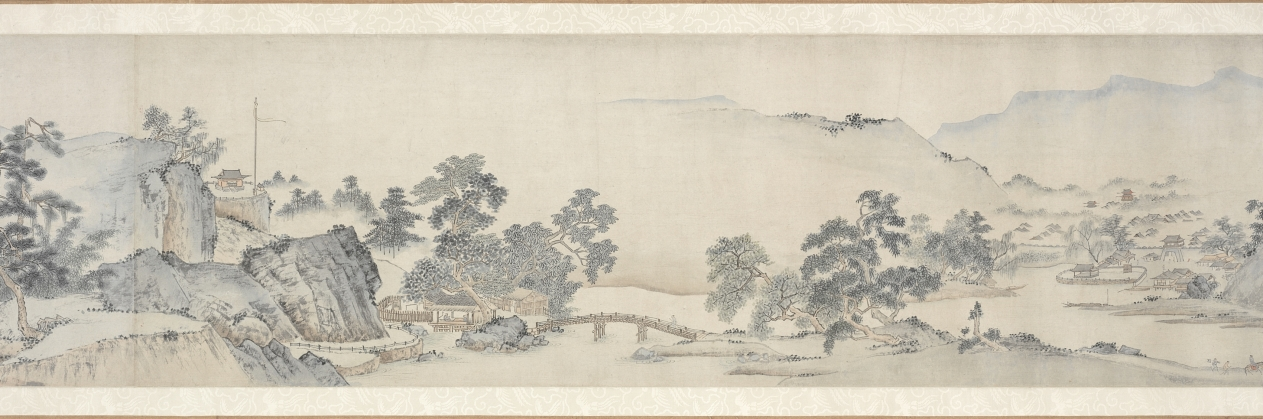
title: Ten Thousand Li of the Yangzi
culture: China, Ming dynasty (1368–1644)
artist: Dai Jin (Chinese, 1388–1462)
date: c. 1400s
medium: Handscroll; ink and color on paper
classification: Painting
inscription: Two colophons at end. Artist's seals: Dai Jin 戴進 and Wenjin 文進.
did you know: Dai Jin is traditionally considered the founder of the Zhe School, a style of landscape painting.